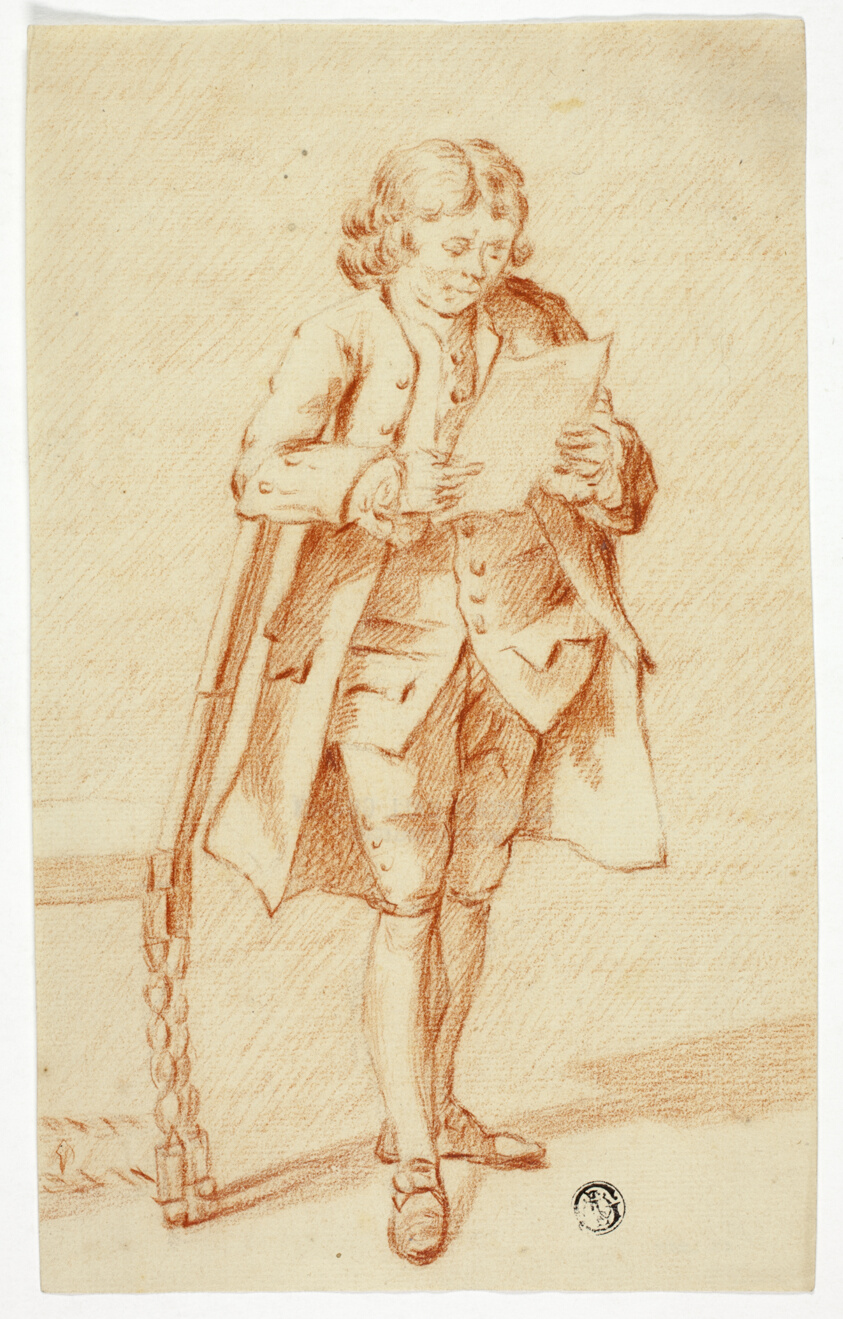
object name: Drawing and Watercolor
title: Standing Man Reading a Letter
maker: Unknown Artist; English, 17th/18th century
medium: Red chalk on cream laid paper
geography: England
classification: chalk; drawings (visual works); prints and drawing